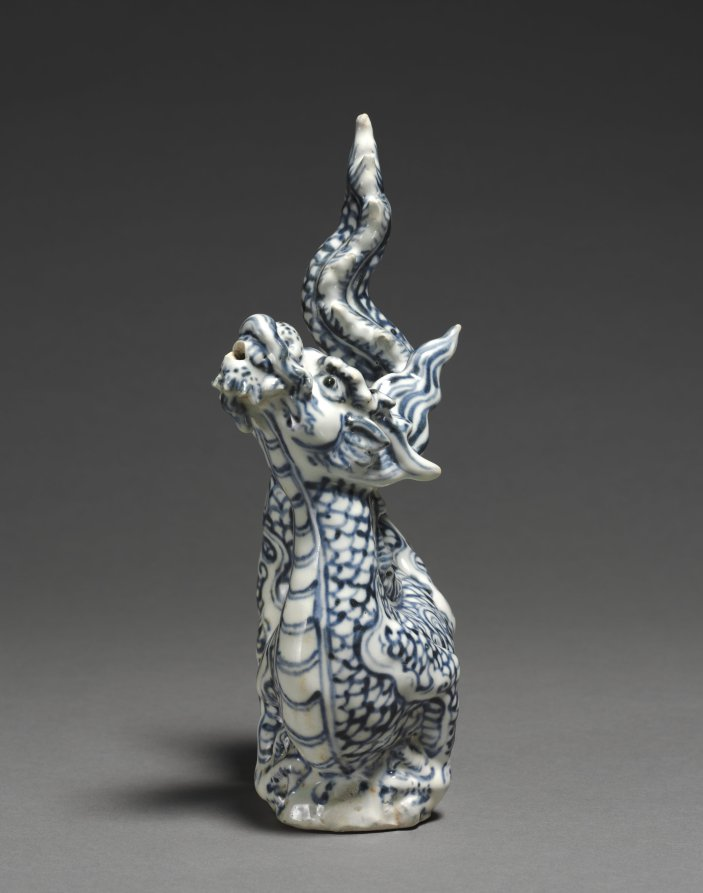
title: Ewer in the Shape of a Dragon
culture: Vietnam (Annam)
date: 1400s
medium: porcelain with underglaze blue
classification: Ceramic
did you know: This dragon-shaped vessel was tilled through a hole in the tail and emptied through the dragon's mouth.